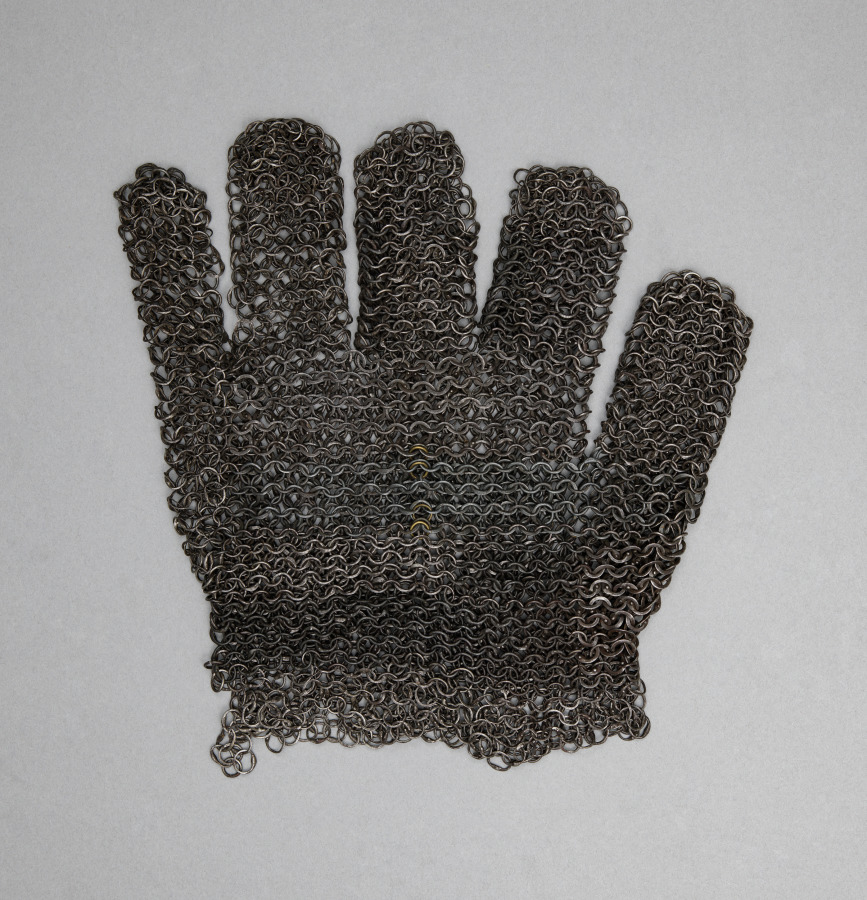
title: Gauntlet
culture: Europe, 16th century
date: 1500s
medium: chain mail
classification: Arms and Armor